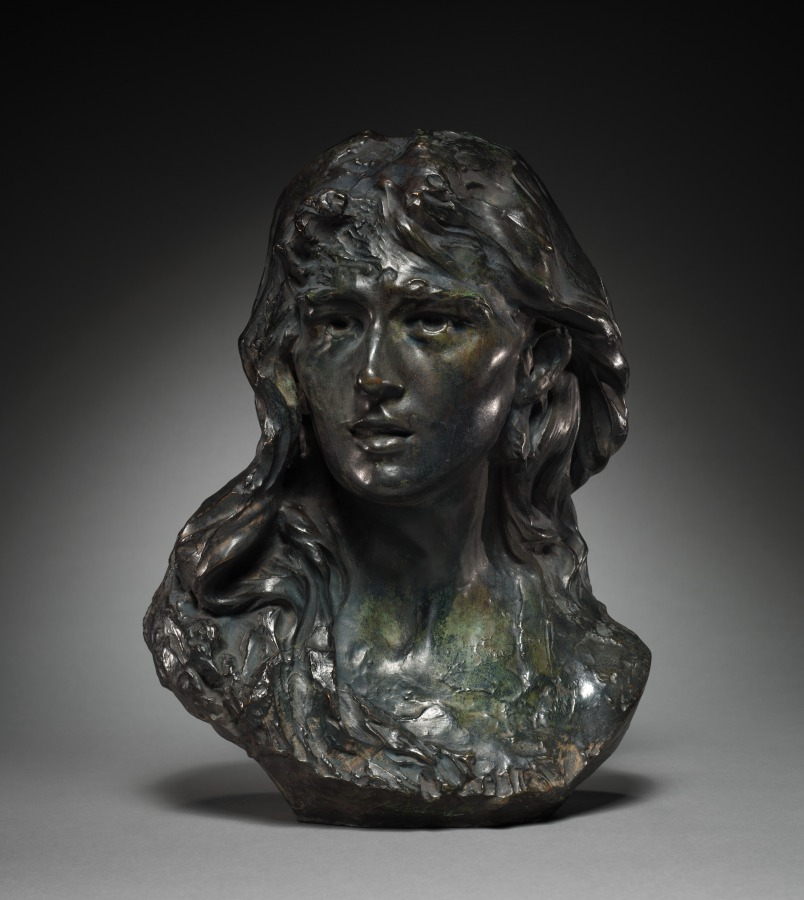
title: Mignon: Bust of Rose Beuret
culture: France, late 19th-early 20th century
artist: Auguste Rodin (French, 1840–1917)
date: c. 1867–1868 (original model)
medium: bronze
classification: Sculpture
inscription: Signed on shoulder to right: "A. Rodin"